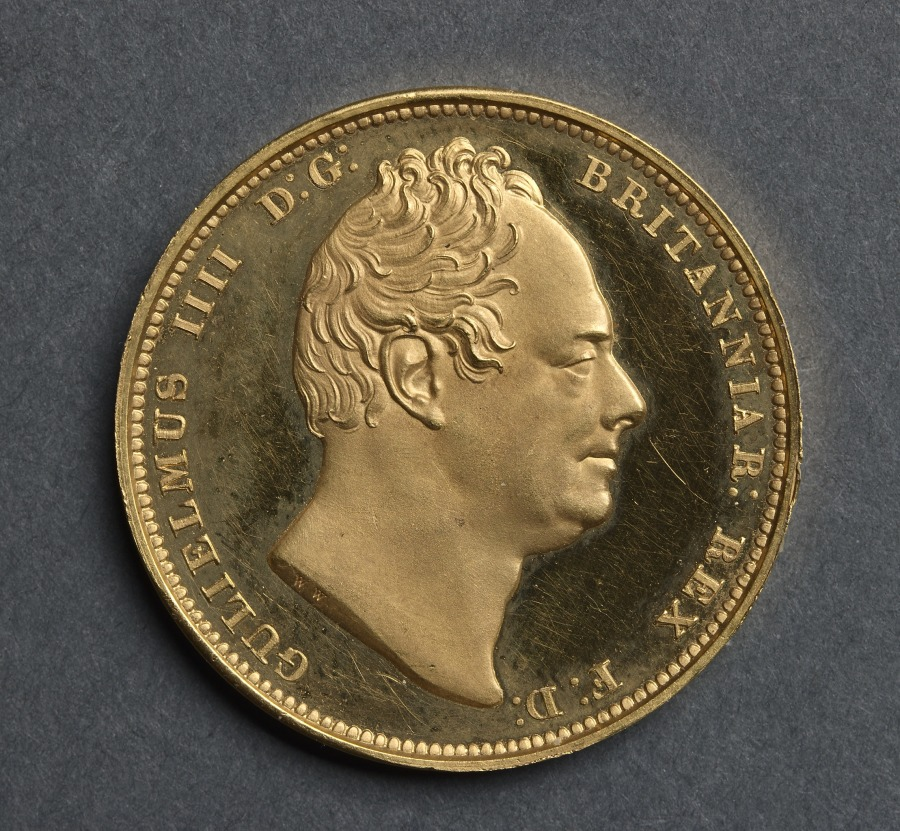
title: Two Pound Piece: George IV (obverse); Shield of Arms (reverse)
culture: England, William IV, 1830-1837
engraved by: Jean Baptiste Merlen (French, 1769–1850)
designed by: William Wyon (British, 1795–1851)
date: 1831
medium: gold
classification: Coins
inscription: BRITANNIAR: REX F: D: GULIELMUS IIII D: G:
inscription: ANNO 1831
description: The two-pound piece in this reign was only struck as a pater in 1831. Again, as in the last reign, a limited number of proof sets were struck, and this coin was included in the sets. Since it never went into circulation it is properly called a pattern.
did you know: This is the largest gold coin issued during his brief reign.